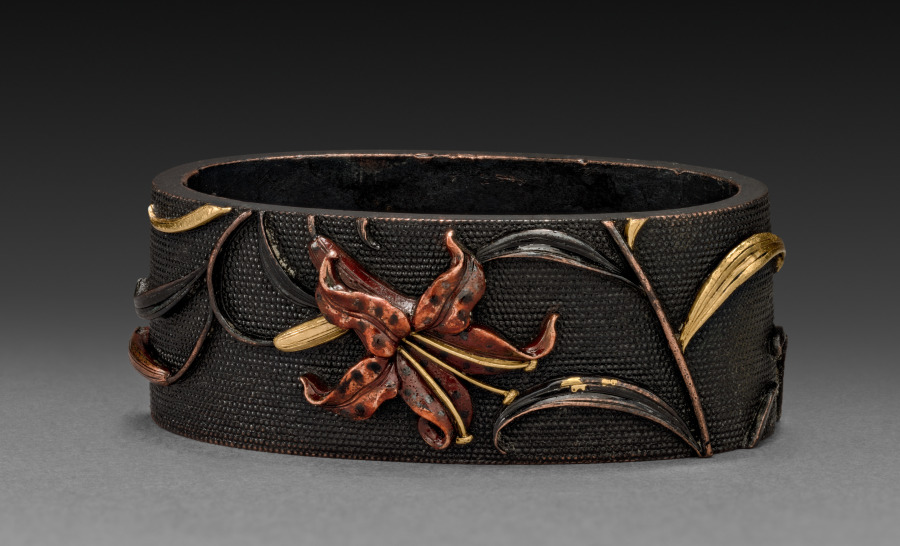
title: Sword-Hilt Collar (Fuchi) with Lily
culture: Japan, Edo period (1615–1868)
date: 1700–1850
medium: shakudo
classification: Arms and Armor